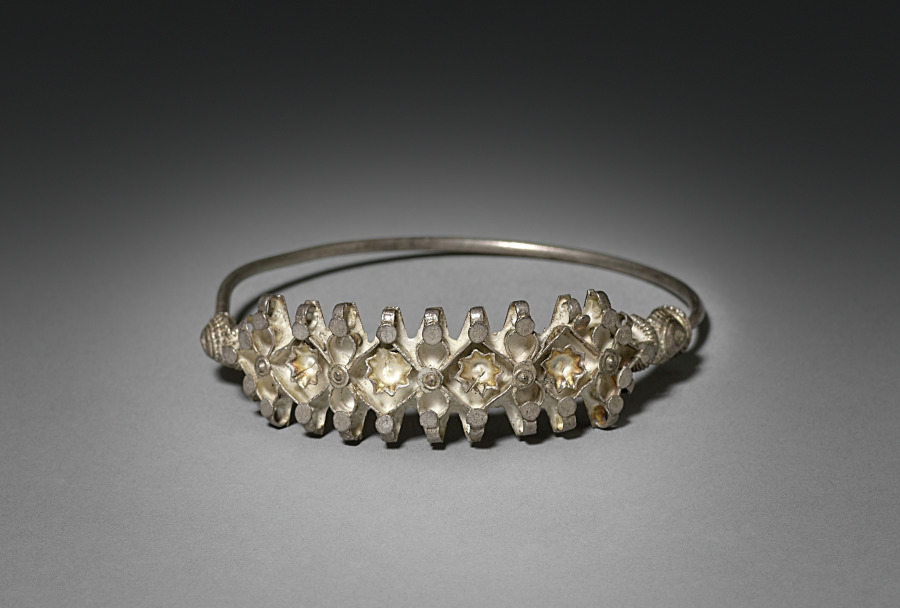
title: Nose Ring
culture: India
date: early 1900s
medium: silver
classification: Jewelry